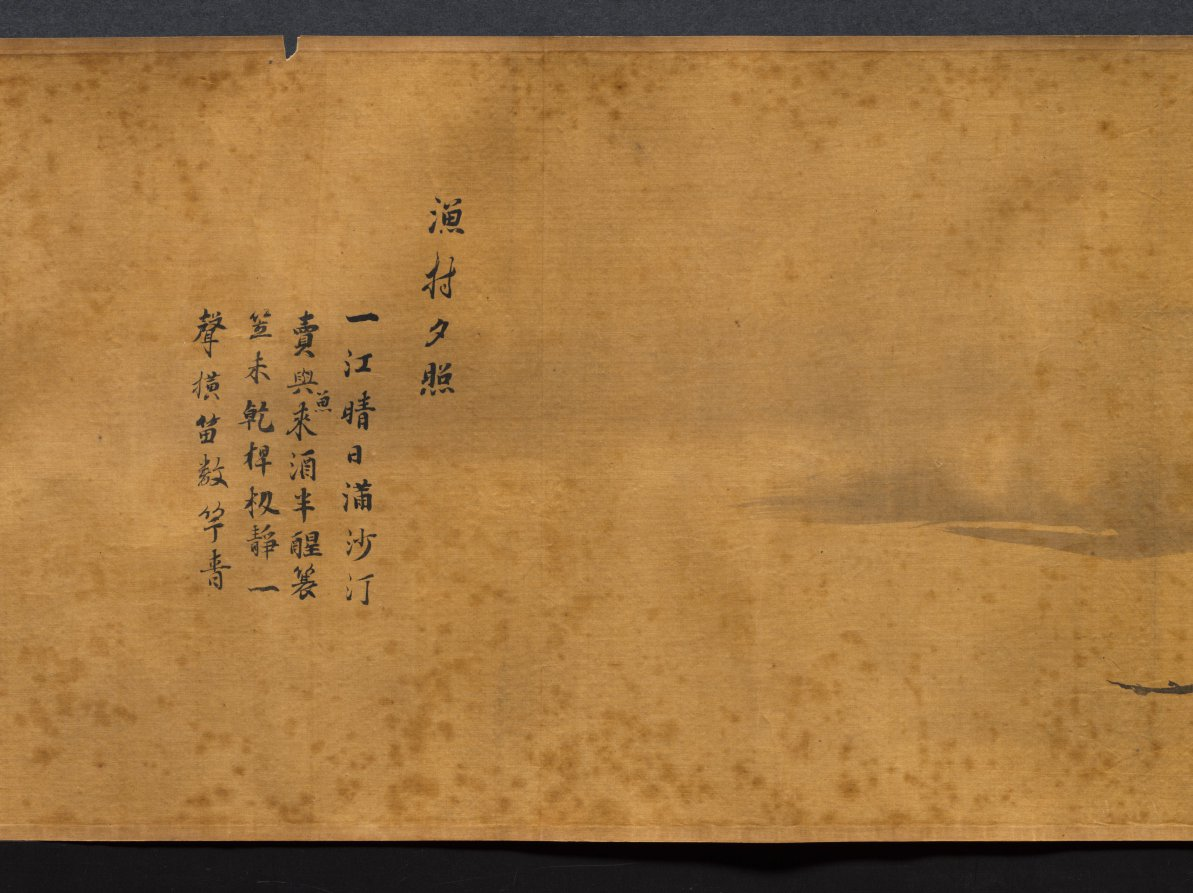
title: Eight Views of Xiao-Xiang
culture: Japan, Edo period (1615–1868)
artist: Kano Tan’yū (Japanese, 1602–1674)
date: 1615–1868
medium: handscroll; ink on silk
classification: Painting